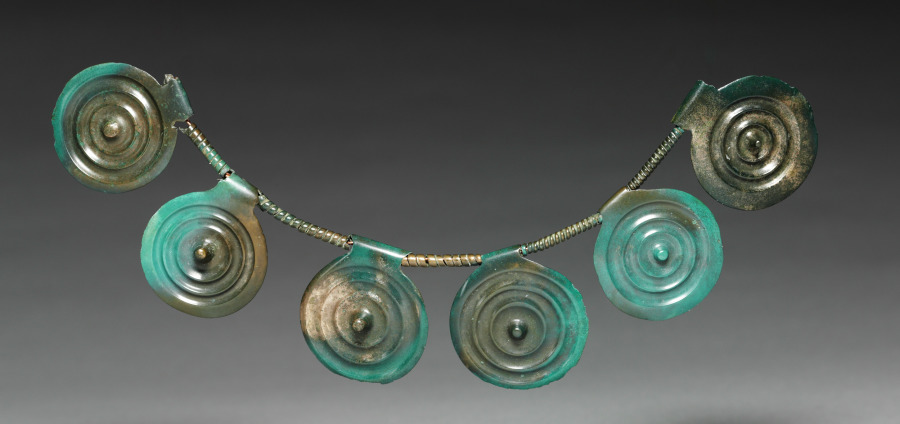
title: Elements from a Necklace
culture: possibly Hungary, Bronze Age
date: c. 1400–1300 BCE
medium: bronze, cast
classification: Jewelry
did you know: The cast bronze necklace pendants are partially oxidized, revealing a green patina.